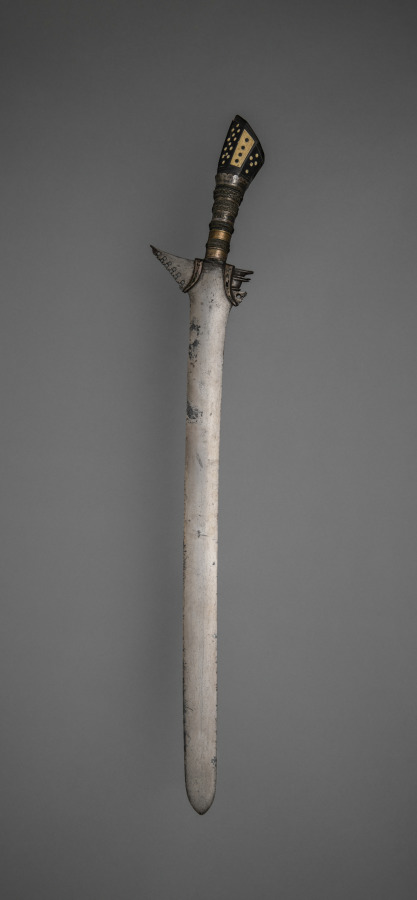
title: Sword (Kris)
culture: Philippines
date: before 1916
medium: Blade: metal; handle: metal with silver ferrules and braided wire; pommel: wood with inlays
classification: Arms and Armor